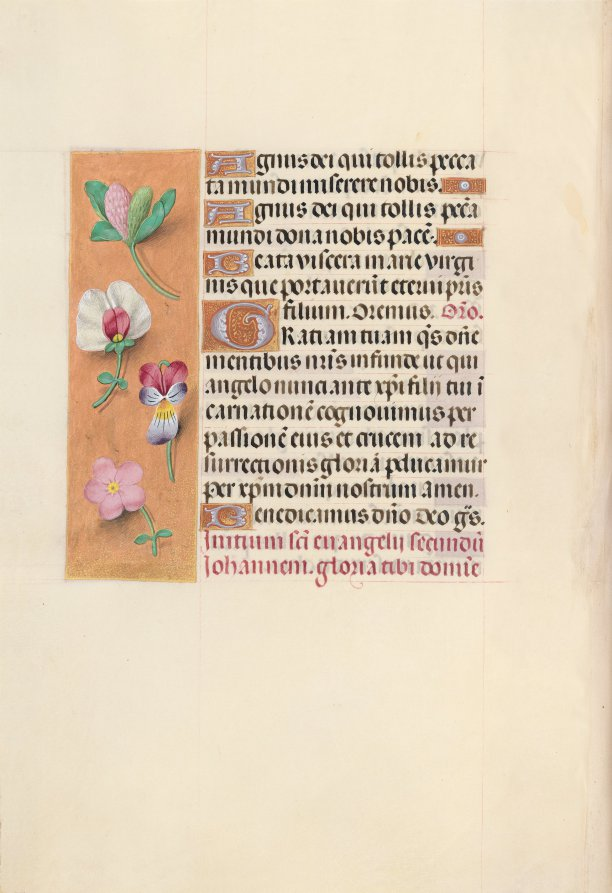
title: Hours of Queen Isabella the Catholic, Queen of Spain: Fol. 92v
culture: Flanders, Ghent and Bruges, late 15th century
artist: Master of the First Prayerbook of Maximillian (Flemish, c. 1444–1519)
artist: and Associates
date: c. 1500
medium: ink, tempera, and gold on vellum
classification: Bound Volume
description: This manuscript was illuminated by a circle of at least five highly organized manuscript painters active in the Flemish cities of Ghent and Bruges. The principal illuminator was Alexander Bening, who painted the majority of the book's miniatures. Manuscripts produced by this circle of artists are renowned for the decoration of their borders, which typically feature a rich variety of realistically-painted flowers, birds, and butterflies. This prayer book, called a book of hours, was intended not for a cleric, but for the private devotions of a lay person-in this case, Isabella the Catholic, Queen of Spain (1451-1504). Isabella's coat of arms embellishes the book's frontispiece. It is unlikely that the book was commissioned by the Queen herself; rather, she probably received it as a diplomatic gift from someone courting her patronage, perhaps Cardinal Francisco Jimenez de Cisneros. A Franciscan friar, Jimenez was dependent upon Isabella for his advancement, first to the post of Queen's confessor in 1492, and then to Archbishop of Toledo in 1495.